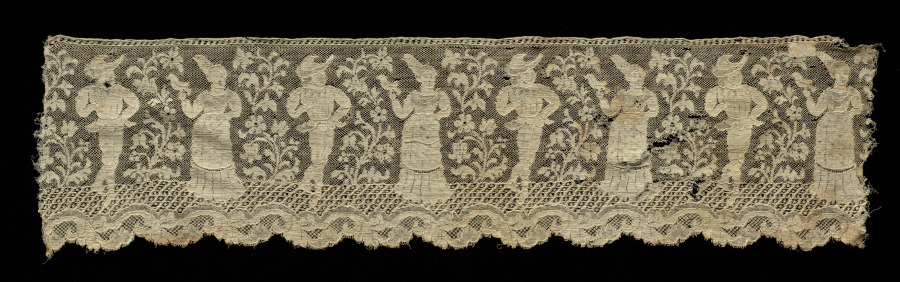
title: Lace Edging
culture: England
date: 1811–15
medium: Machine-made lace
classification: Lace